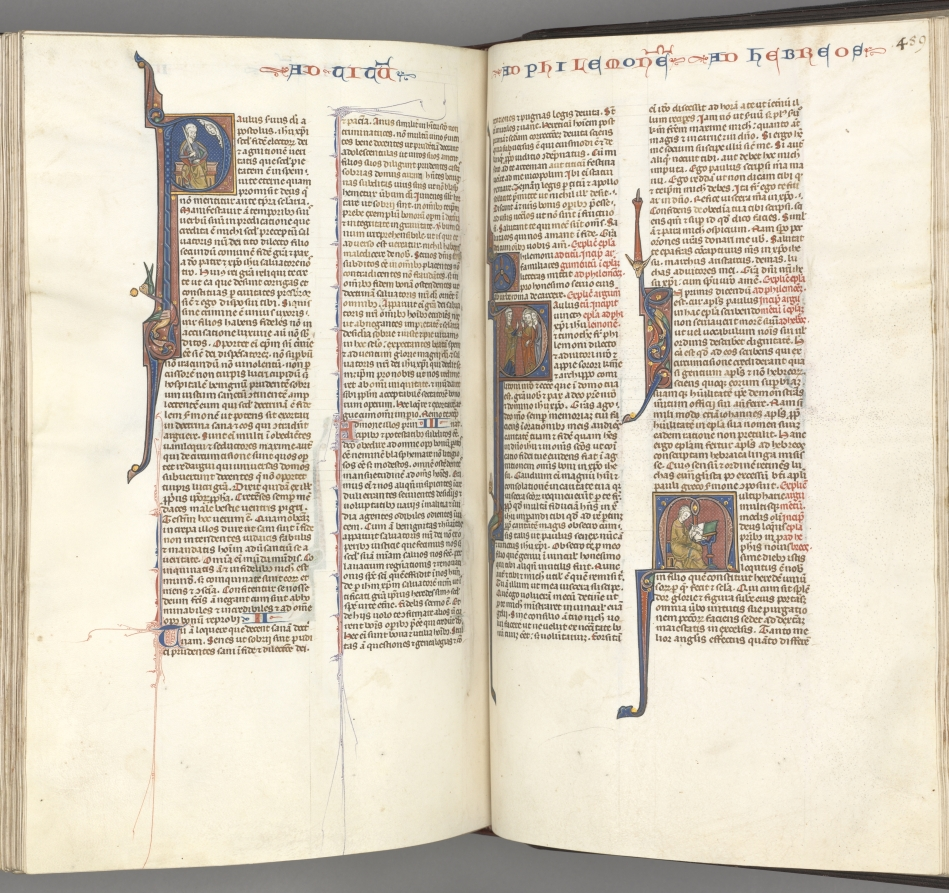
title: Fol. 459r, Philemon, historiated initial P, Paul addressing three men and Hebrews, historiated initial M, Paul seated at a desk, writing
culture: Southern France, Toulouse(?), 13th century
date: c. 1275–1300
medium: ink, tempera, and gold on vellum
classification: Bound Volume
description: Biblical manuscripts were highly prized and important possessions of churches, monasteries, cathedral schools, and universities throughout medieval Europe. The biblical texts were known as the vulgate, the translations made by Saint Jerome in the fourth century from Hebrew and Greek into Latin, which became the definitive and official Latin version of the Roman Church. In the 13th century, the bible was, for the first time, produced as a single volume with an officially sanctioned sequence to its books and chapters as illustrated by this example. The very extensive decoration of this bible is arranged hierarchically to indicate the relative importance of the various texts so that full or almost full-page initials mark the openings of the first prologue, Genesis, and the first Gospel; historiated initials mark the beginning of each book and illuminated initials mark the Prologues.